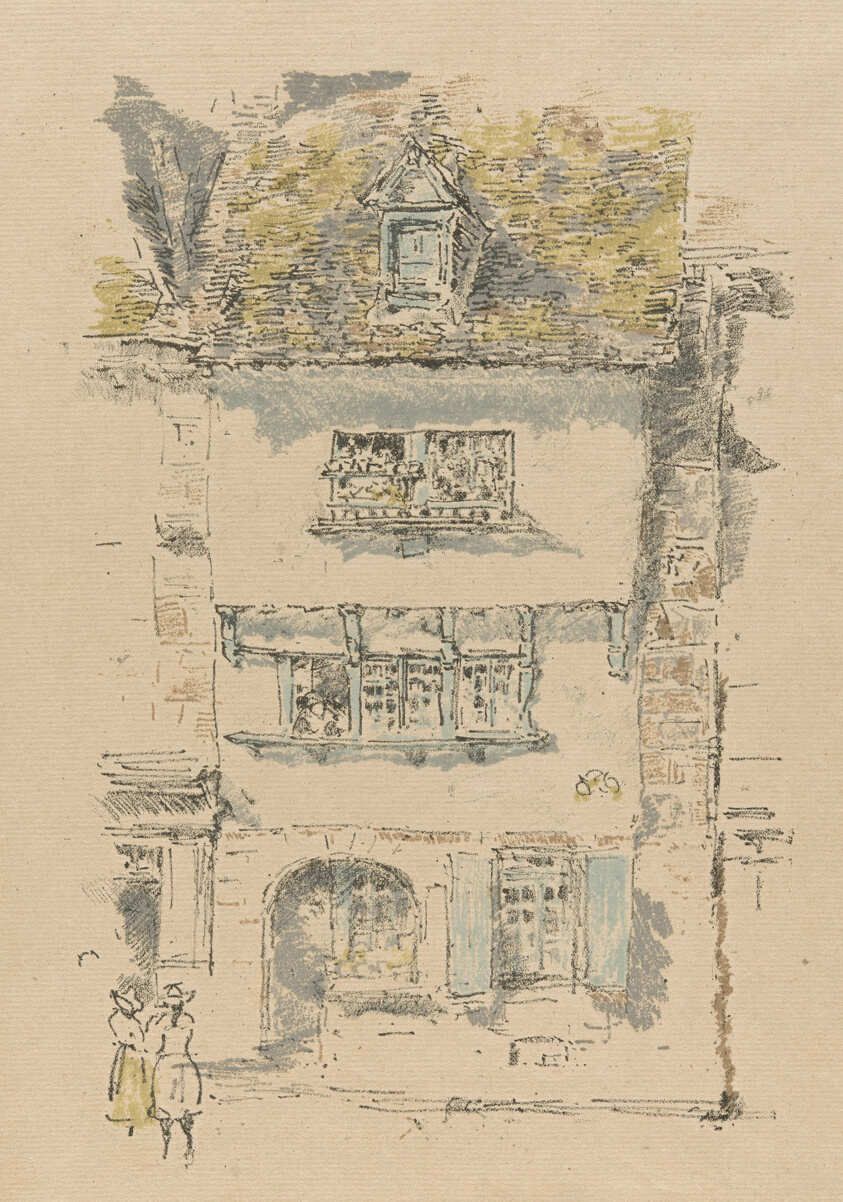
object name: Print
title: Yellow House, Lannion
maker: James McNeill Whistler (American, 1834-1903)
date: 1893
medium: Transfer lithograph, with scraping, from six stones, in black (keystone), greenish gray, brown, light blue, yellow, and gray inks on ivory laid paper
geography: United States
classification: transfer lithograph; lithograph; print; prints and drawing; paper